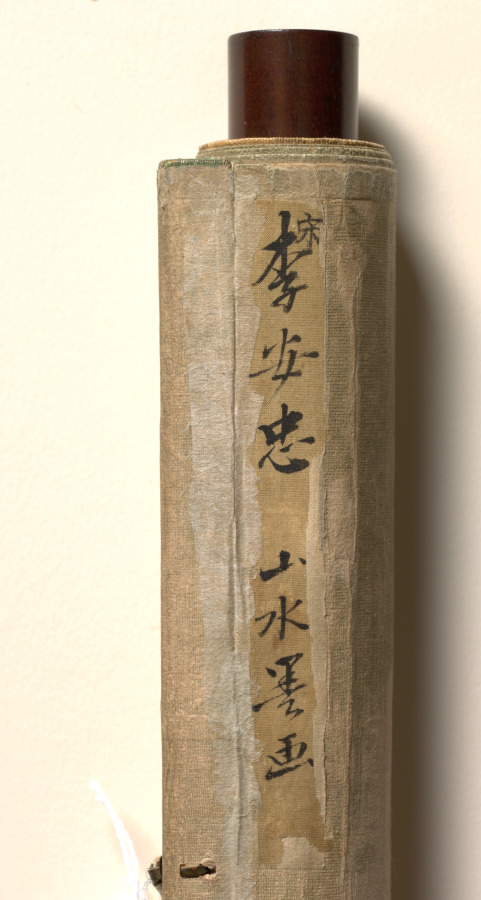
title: Landscape with Fishermen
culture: Korea, Joseon dynasty (1392–1910)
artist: attributed to Yi Bul-hae (Korean, active 1500s)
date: 1600s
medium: hanging scroll; ink and slight color on silk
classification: Painting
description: Clad in a straw rain poncho and wide-brimmed hat, a fisherman is seated in a small boat. Reeds sparkle on the far shoreline among dark, black rock forms that appear to float above the water. On the near shoreline are a pair of pines, a grove of bamboo or water reeds, and two withered deciduous trees from which moss hangs. This landscape painting, which emphasizes an intimate solitary moment through evoking various atmospheric elements—rain, evening light, and frosty air—was one of the main subjects of mid- and late 16th-century landscape paintings.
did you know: This landscape painting emphasizes an intimate solitary moment by evoking various atmospheric elements: rain, evening light, and frosty air.